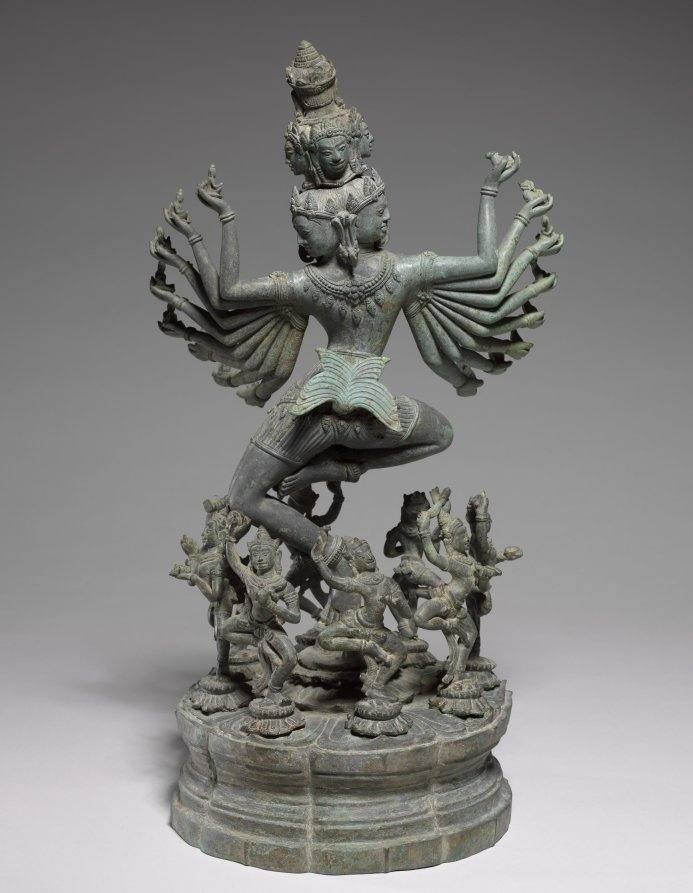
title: Hevajra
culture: Northeastern Thailand, former kingdom of Angkor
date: c. 1200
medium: Bronze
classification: Sculpture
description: Hevajra was an important figure signaling the practice of Buddhist rituals. King Jayavarman VII placed particular emphasis on Hevajra during consecration rituals and set up a colossal stone sculpture of dancing Hevajra at the east gate of his fortified city in the Khmer capital at Angkor. In the Cambodia of Jayavarman VII, tantric Buddhism became public and widespread, practiced together with other more mainstream forms of Buddhism, Hinduism, and ancestor worship. The iconography of Hevajra is described in detail in a text that bears his name, the Hevajra-tantra, first composed in India probably in the 800s. Hevajra has eight heads, sixteen arms, and four legs. His left hands hold images of Indic gods; wealth, death, sun, moon, fire, wind, water, and earth. In his right hands are animals: bull, lion, human, cat, camel, sheep, horse, and elephant. They all sit in skull cups, objects also used in tantric rituals. He dances on a corpse that embodies ignorance and is surrounded by eight yoginis who dance triumphantly in a ring around him. Yoginis functioned as intercessors between human practitioners and enlightened beings. Many bronze images of Hevajra were made during the reign of Jayavarman VII, but few survive in as pristine condition as this example. According to scientific analysis and curatorial reports, this sculpture survived in a clay vessel submerged in water, which accounts for its high tin content and unusual gray patina. Samples from the clay core reveal the presence of the mineral feldspar, a characteristic of clay from the Isaan plateau, on the other side of the mountain range not far from Banteay Chhmar, in present-day Thailand.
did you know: Hevajra, the Tantric Buddhist deity who personifies Enlightenment, dances vigorously to symbolize the human soul's liberation from the snare of existence.